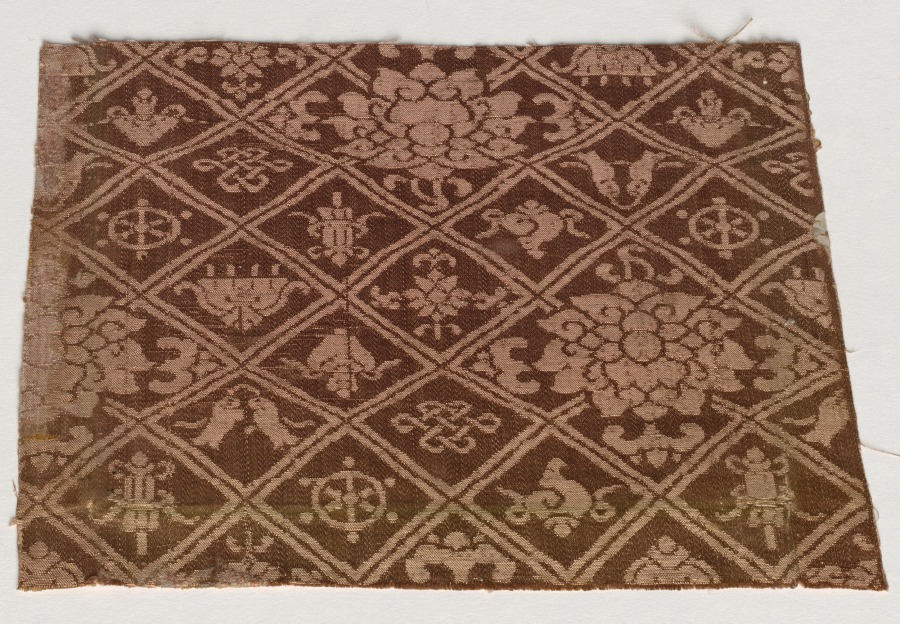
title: Fragment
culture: China ?, 19th century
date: 1800s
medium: silk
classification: Textile